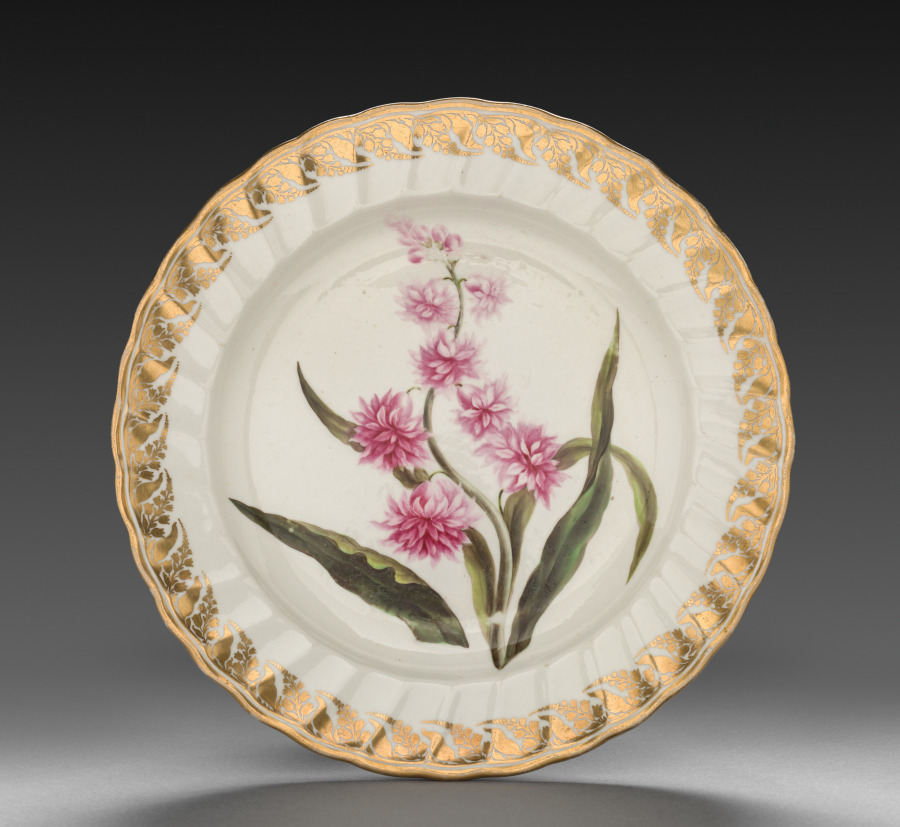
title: Plate from Dessert Service: Eastern Hyacinth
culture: England, Derby, 18th century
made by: Derby (Crown Derby Period) (British)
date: c. 1800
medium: porcelain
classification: Ceramic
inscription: inscribed in blue on back: Hyancinthus Orientalis./Eastern Hyacinth./crown/crossed batons and dots/D/115. Near edge: 9.